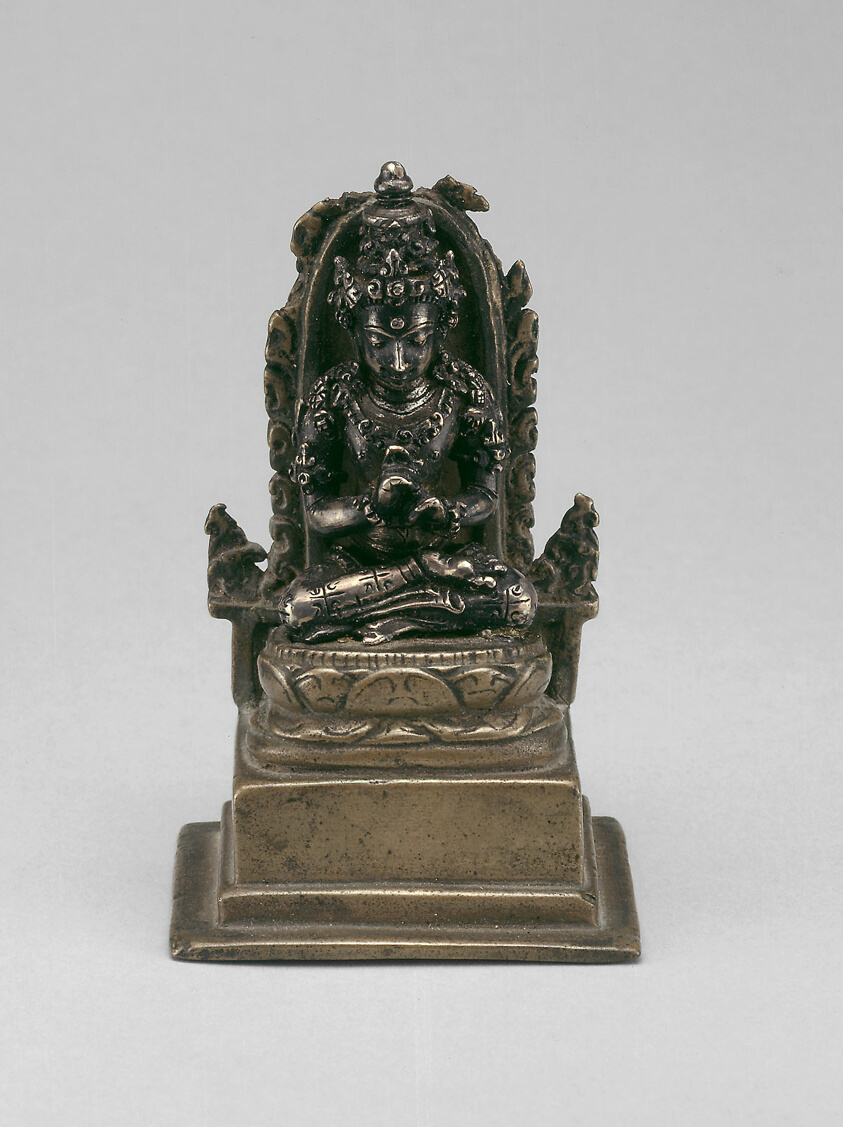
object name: Sculpture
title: Mahavairochana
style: Southeast Asian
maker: Indonesia; Central Java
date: 9th/10th century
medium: Silver and copper alloy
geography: Central Java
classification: silver; metal; sculpture; asian art